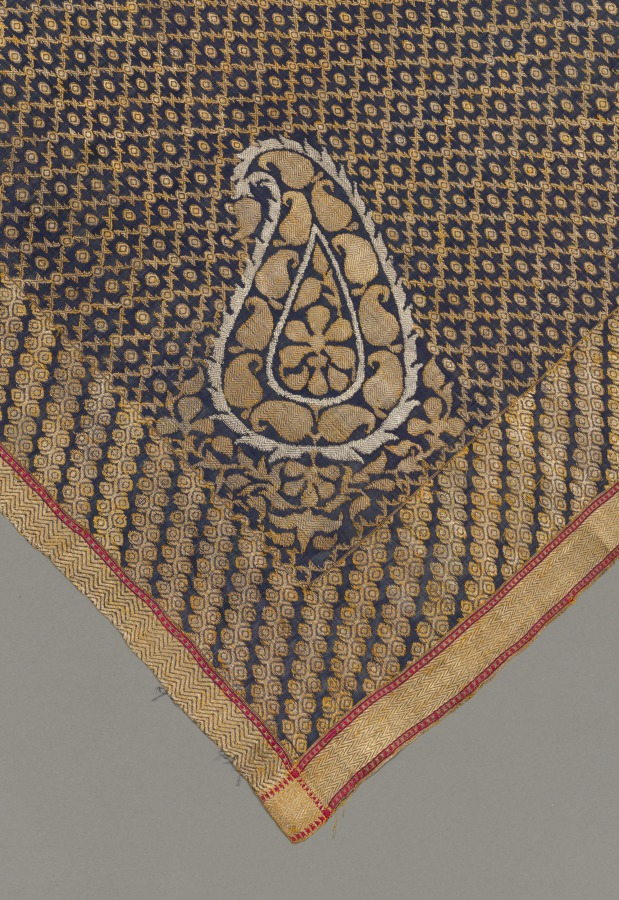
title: Fragment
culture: India, 19th century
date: 1800s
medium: brocade; silk, gold and silver threads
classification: Textile